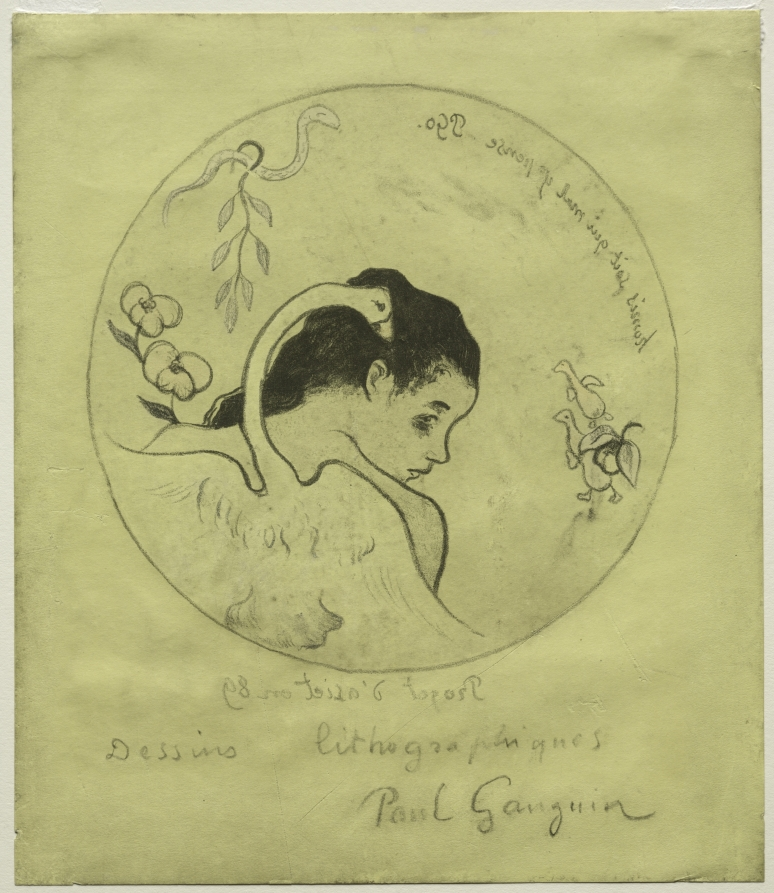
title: Volpini Suite: Design for a Plate: Leda and the Swan (Projet d'Assiette: Léda et le Cygne)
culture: France, 19th century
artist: Paul Gauguin (French, 1848–1903)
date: 1889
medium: zincograph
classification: Print